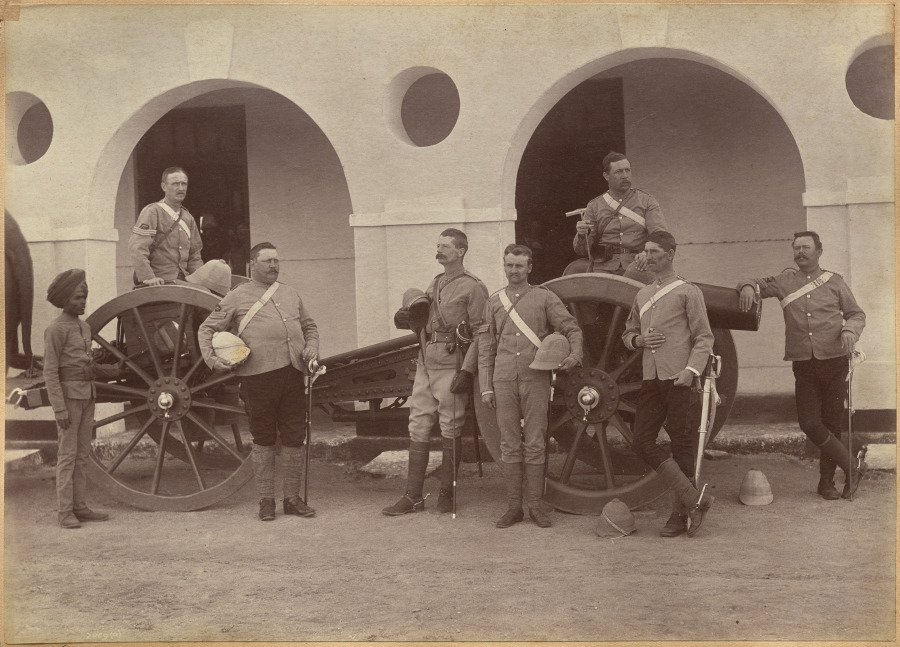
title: Officers of Elephant Battery, Jhansi (recto)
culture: India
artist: Raja Deen Dayal (Indian, 1844–1905)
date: c. 1882–87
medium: albumen print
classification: Photograph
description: These photographs are part of an album, now disassembled, of around 105 photographs taken in India between 1885 and summer 1887 that provide glimpses into the lives of the British colonial elite and royal and upper-class Indians. The museum holds another group of 37 pictures from this album (2016.266), which was probably commissioned by a British civil servant visiting or working in India around 1888 as a personal souvenir of his experiences there.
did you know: Raja Deen Dayal is regarded now, and was considered during his lifetime, to be India’s most important 19th-century photographer.